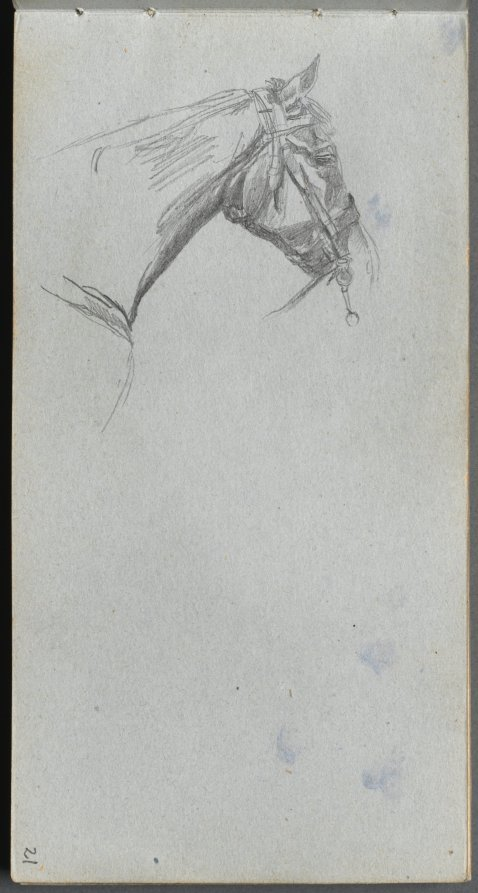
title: Sketchbook, page 21: Study of a Horse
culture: France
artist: Ernest Meissonier (French, 1815–1891)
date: c. 1860s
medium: graphite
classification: Bound Volume